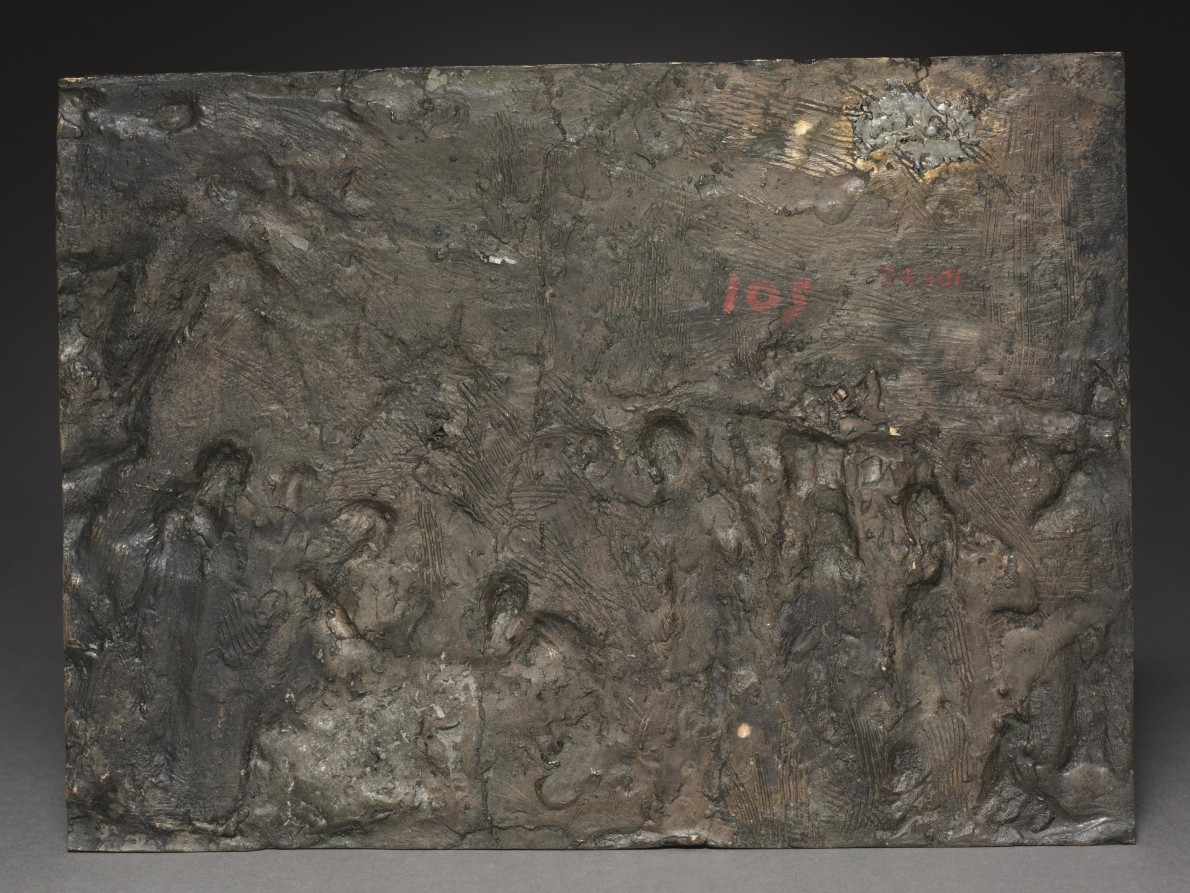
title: Adoration of the Magi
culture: Italy, first quarter 16th century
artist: attributed to Giulio della Torre (Italian, c. 1481–before 1563)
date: c. 1500–1525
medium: bronze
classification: Sculpture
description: Figures leading livestock descend the winding rocky landscape in the background while in the foreground, a crowd gathers before the Holy Family. The traveling figures compose the majority of this plaque, communicating the haste and urgency on their journey to see Christ. Above the Holy Family, a rustic hut creates a canopy. The Madonna and Child sit prominently at the right on a Renaissance bench, receiving the Three Kings. The first king kneels as the Christ Child bends to accept the gift. Joseph stands cross-armed behind the Madonna with two winged angels at his side. Behind him are the heads of an ox and an ass, traditional elements of nativity scenes. To the left three children play while a youth leans on a pagan altar. The torso of an ancient sculpture lies on the ground before it, demonstrating that Christ has come to replace the ancient gods. This low-relief plaque was once believed to have been destroyed in 1914 but is now thought to have been a part of the Count W. Pourtalès collection in St. Petersburg, Russia. Adoration of the Magi resembles a 1506 relief by Riccio made for the Easter Candle in the Basilica of St. Anthony in Padua.